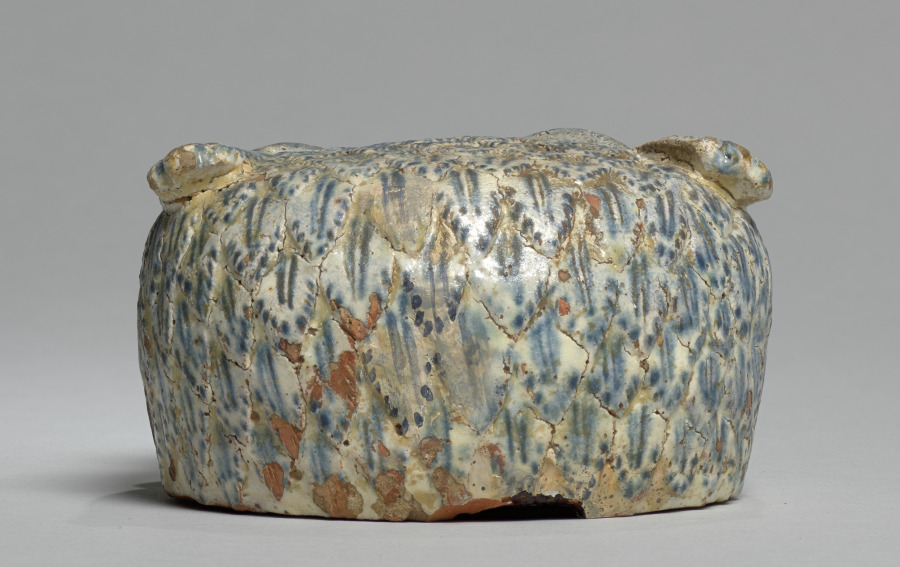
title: Owl (head)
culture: Southern Germany, 16th century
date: 1540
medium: faience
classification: Ceramic